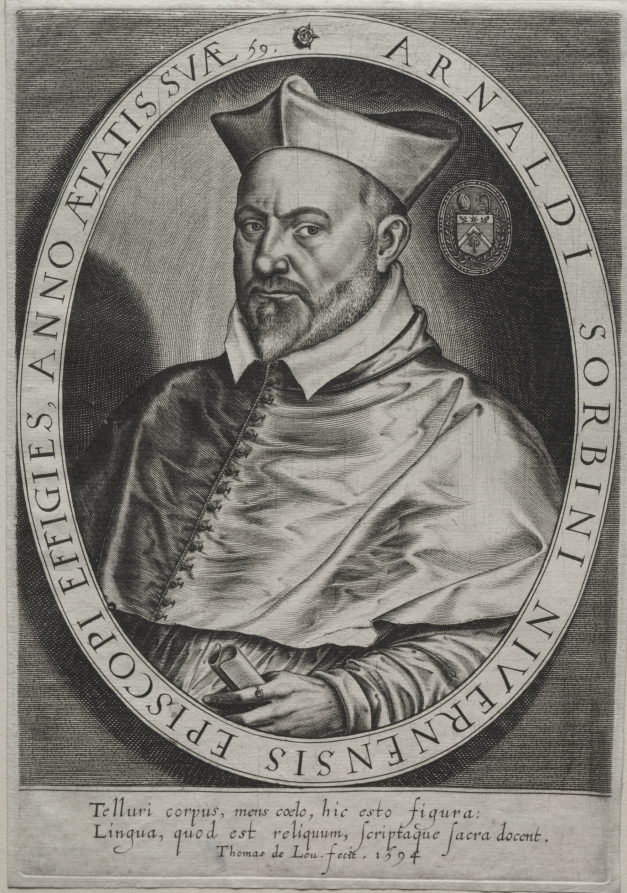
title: Sorbin de Ste Foy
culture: France, 16th century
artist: Thomas de Leu (French)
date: 1594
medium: engraving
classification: Print